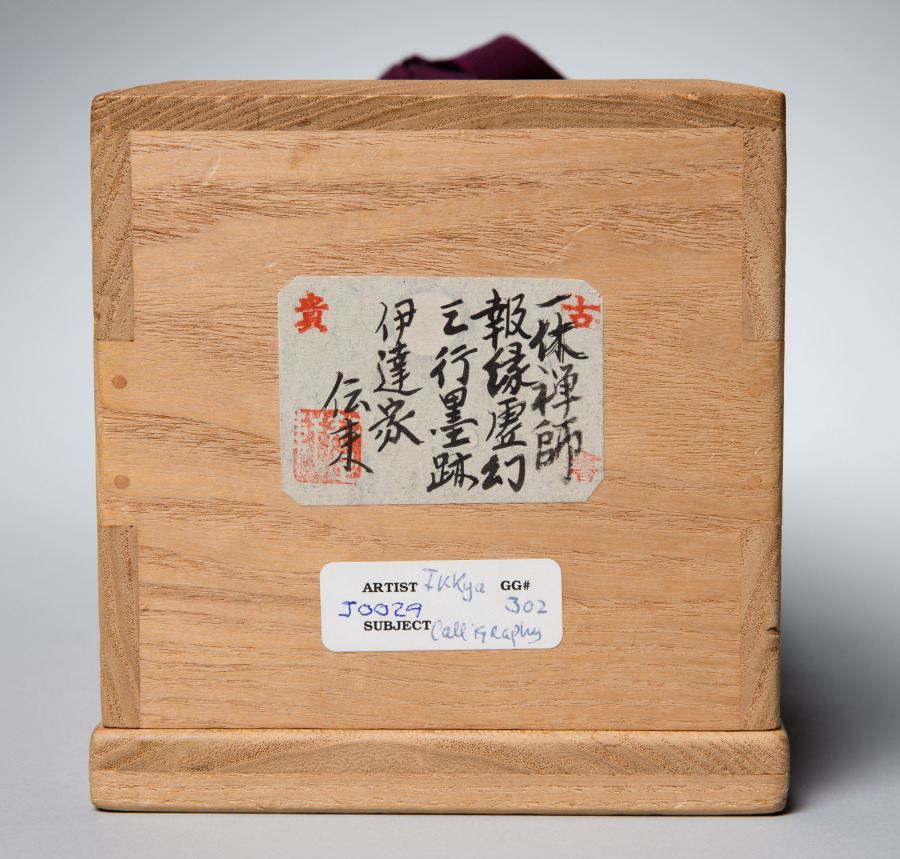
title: Reflections of Priest Foyen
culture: Japan, Muromachi period (1392–1573)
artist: Ikkyū Sōjun (Japanese, 1394–1481)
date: 1400s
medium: hanging scroll, ink on paper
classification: Painting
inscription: signed: "Kido nanasei son, Ikkyūshi Sōjun sho (Written by Ikkyū Sōjun, the seventh generation of Kido)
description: Left by his mother at a small Zen temple in Kyoto at the age of six, Ikkyu later drew on his early studies and experiences for his writings, which focused on his keen interest in the Chinese classics. Poetry in particular was a favorite subject and images from classical poetry or passages from favorite poems or commentaries frequently provided Ikkyu with the core ideas for his own work. A rare example of his calligraphy, this narrow scroll contains a verse in eight phrases, each comprising four characters. The whole verse is organized in three towering lines of brusque, emphatic calligraphy augmented by Ikkyu's signature-the two lines of running script in the lower left corner. The text refers to a passage included in the Chronicle of the Zen Sect that contains a cautionary reminder attributed to the legendary Chinese monk Foyen Qingyuan (1067-1120), long revered in Japan. The initial phrase begins: "Life is a mirage."